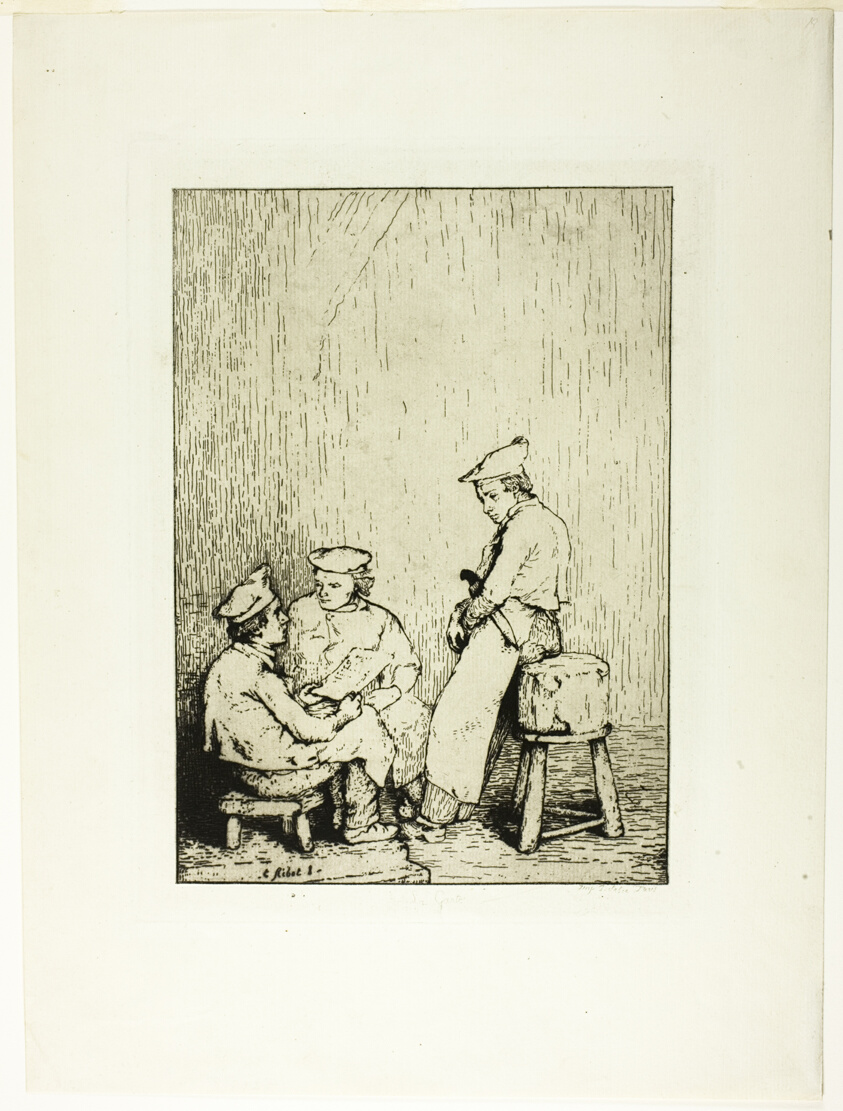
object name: Print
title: The Menu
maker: Théodule Augustin Ribot; French, 1823-1891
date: c. 1870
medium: Etching on ivory laid paper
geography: France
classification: etching; print; prints and drawing